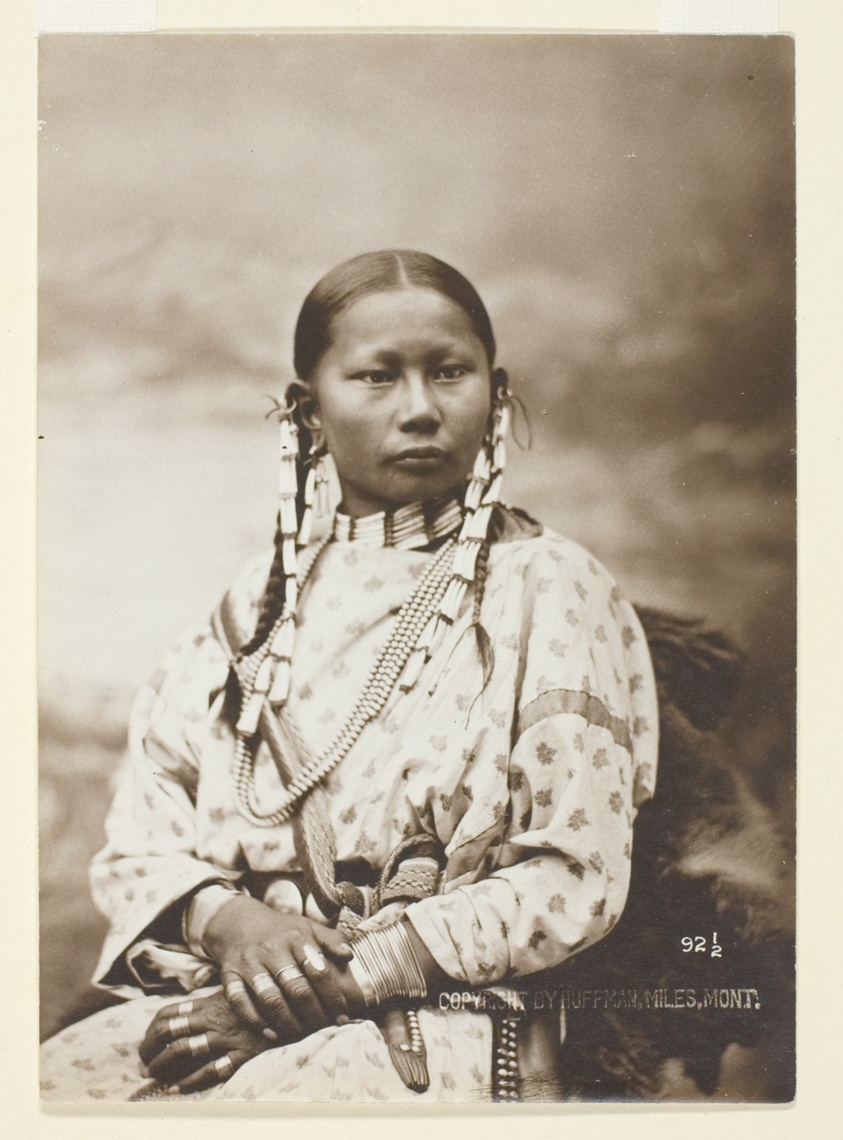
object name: Photograph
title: Spotted Fawn, Cheyenne bride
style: 19th century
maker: Laton Alton Huffman (American, 1854–1931)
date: 1879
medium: Gelatin silver print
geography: United States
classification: gelatin silver (developing-out-paper) pr; photographic process; photography; photograph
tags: portraits, portraits: female subject, photography, portraits: Native American subject